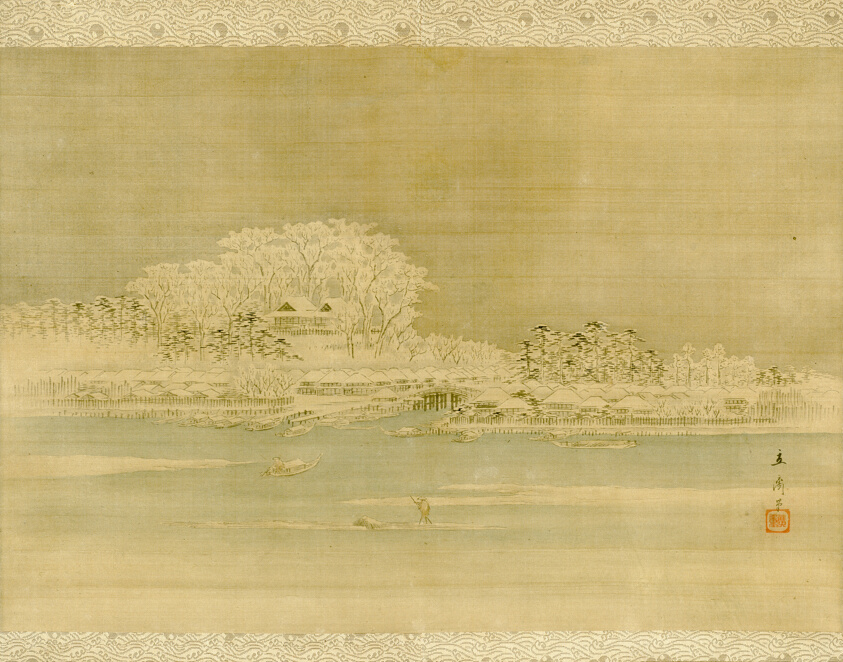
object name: Painting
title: Matsuchiyama on the Sumida River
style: Japanese (culture or style)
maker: Utagawa Hiroshige 歌川 広重; Japanese, 1797-1858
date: Edo period, 1856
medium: Hanging scroll; Ink and color on silk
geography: Japan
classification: hanging scroll; painting; asian art